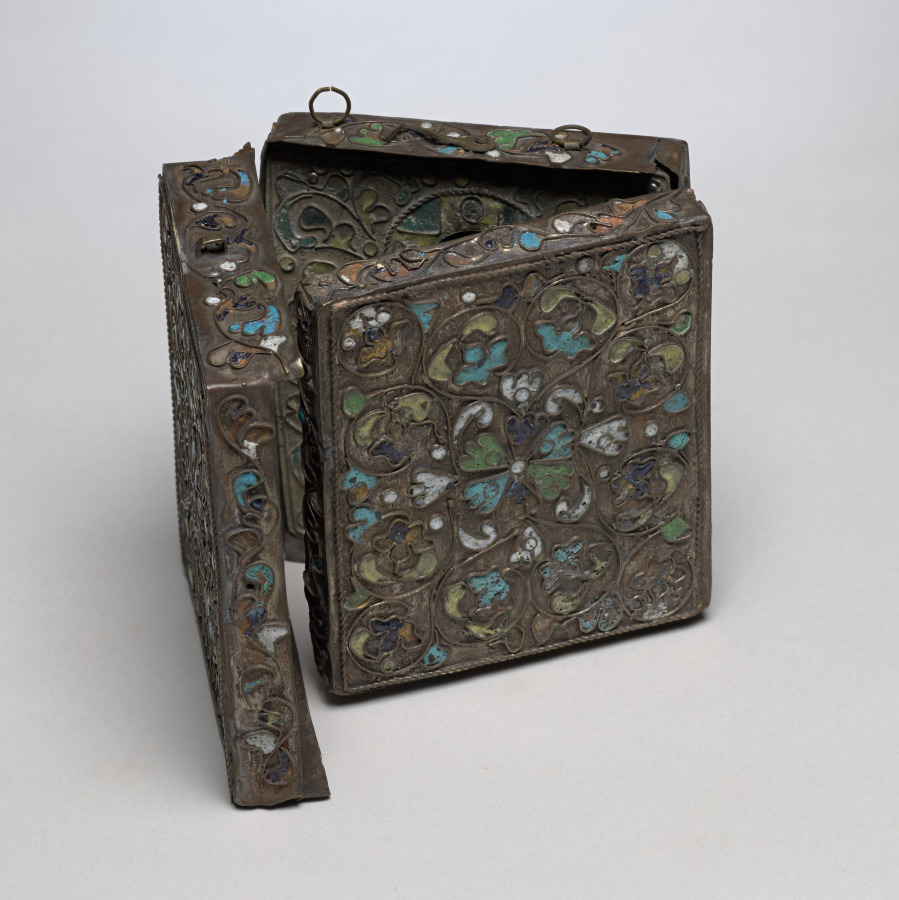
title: Triptych with Christ, the Virgin, and St. John the Evangelist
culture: Russia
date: 1800s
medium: pigment on wood, in cloisonné enamelled insert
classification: Painting